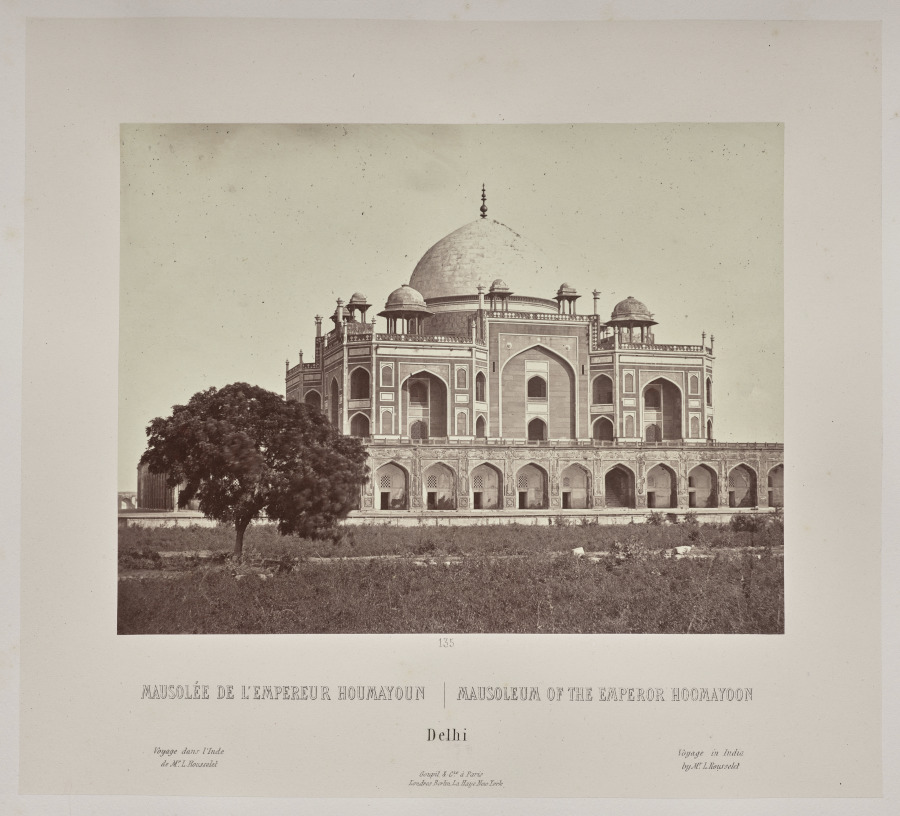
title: Mausoleum of the Emperor Hoomayoon, Delhi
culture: France, 19th century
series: India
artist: Louis-Théophile Marie Rousselet (French, 1845–1929)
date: 1865–68, published 1869–70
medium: Albumen print from glass plate negative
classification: Photograph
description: Concerned that his drawings did not do justice to the splendor of India’s monuments, Rousselet learned photography in India that year, a remarkable accomplishment. He proved to be a talented photographer with a sophisticated sense of composition. The scenes in this volume sweep across sites of Sultanate, Rajput, and Mughal power in northern India, from the sacred Hindu city of Varanasi on the Ganges River to Alwar in Rajasthan. Also included are several scenes of industry and portraits of Indian rulers.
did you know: Louis Rousselet described himself as a “scientific traveler” when he went to India alone at age 18 in 1863 and stayed into 1868.